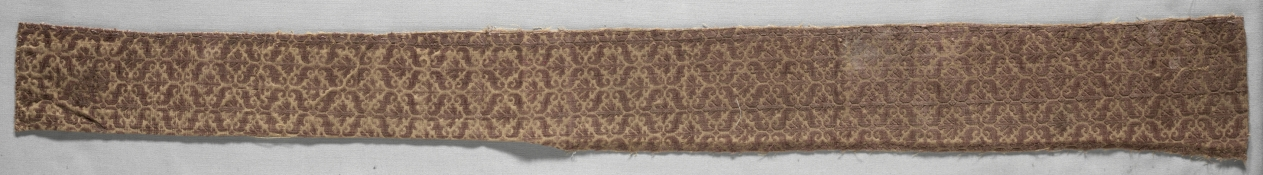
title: Velvet Band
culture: Italy, 16th-17th century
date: 1500s-1600s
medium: velvet (cut and uncut); silk and metal thread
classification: Velvet